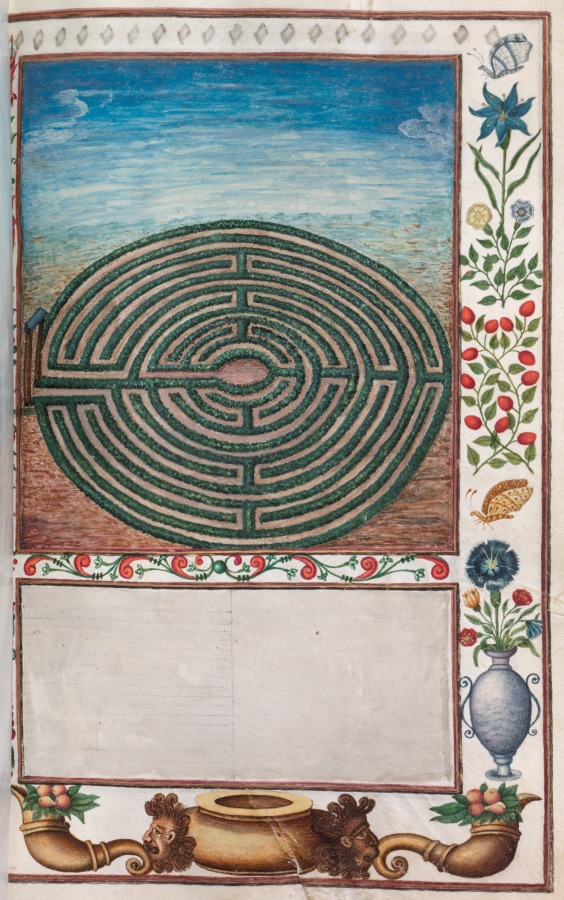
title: Labyrinth with Floral and Cornucopia Border, folio 16 (recto), from Florilegium (A Book of Flower Studies)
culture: France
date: 1608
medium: watercolor, ink, silver, and gold over occasional traces of pencil, on vellum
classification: Bound Volume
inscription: Dated: Poitiers 1608 (on frontispiece) Signed: On frontispiece in black ink, lower right: Van Kuyk Notation on drawing: Frontispiece: in pencil, lower margin: * élève de Van Kessel, peintre flammand (* in pencil also appears in front of Van Kuyk's name).